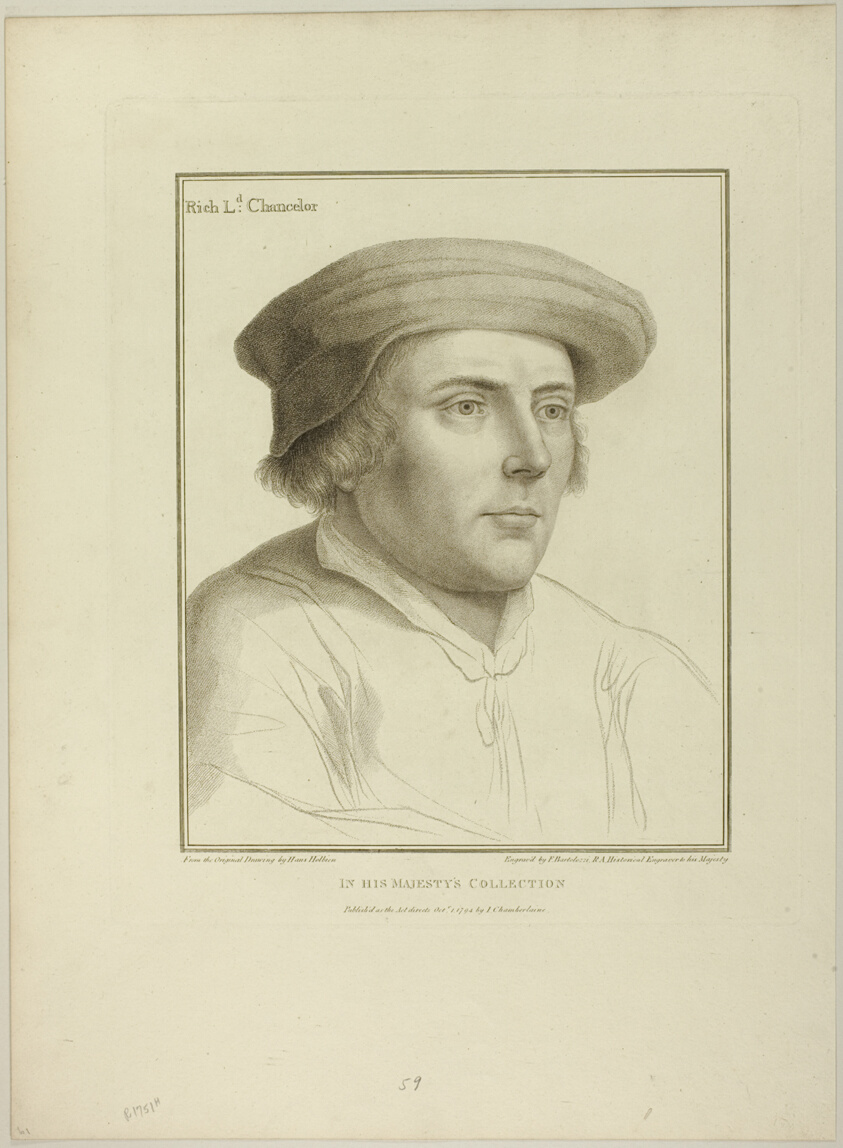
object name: Print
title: Lord Rich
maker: Francesco Bartolozzi (Italian, 1727-1815); after Hans Holbein the younger (German, 1497-1543)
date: October 1, 1794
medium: Stipple engraving on ivory wove paper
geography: Italy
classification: engraving; print; prints and drawing